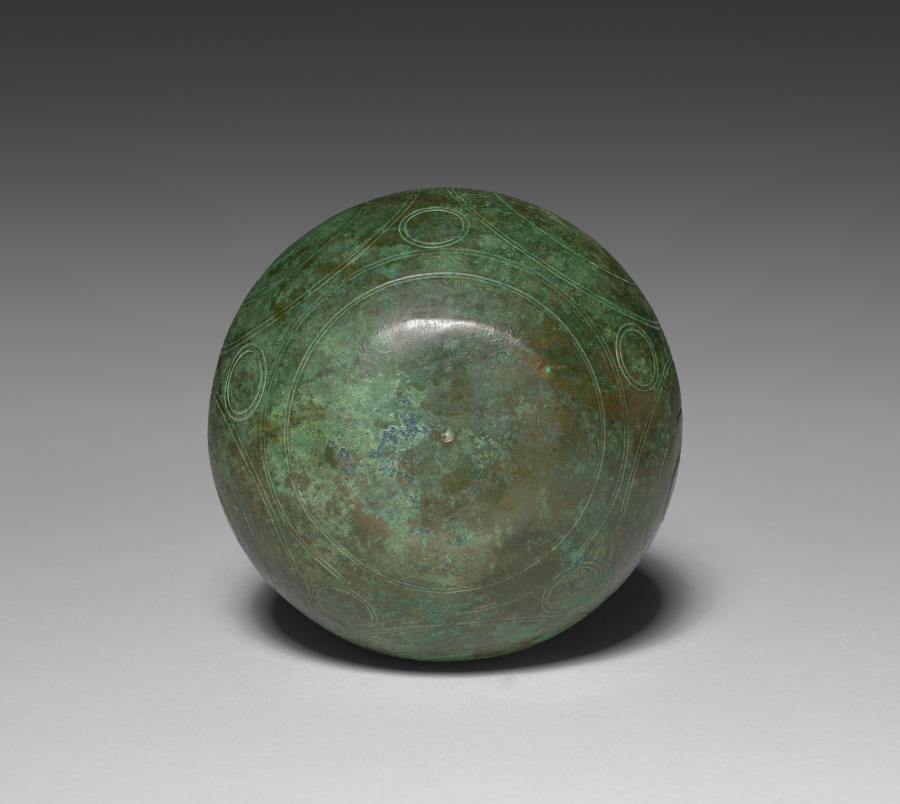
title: Canteen or Balsamarium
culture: Roman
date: 50–250 CE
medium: Bronze, cast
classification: Metalwork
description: A utilitarian container, this nearly spherical cast bronze vessel survives in surprisingly good condition. Two goat heads on the shoulder, each with inlaid silver eyes, serve as decorative attachments, holding two hand-wrought linked chains – a shorter one to secure the stopper and a longer one for hanging or carrying the vessel. The round body of the vessel is nicely complemented by a decorative program of shallowly incised bands and concentric circles.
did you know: The goat heads on the shoulder of this vessel each have inlaid silver eyes.